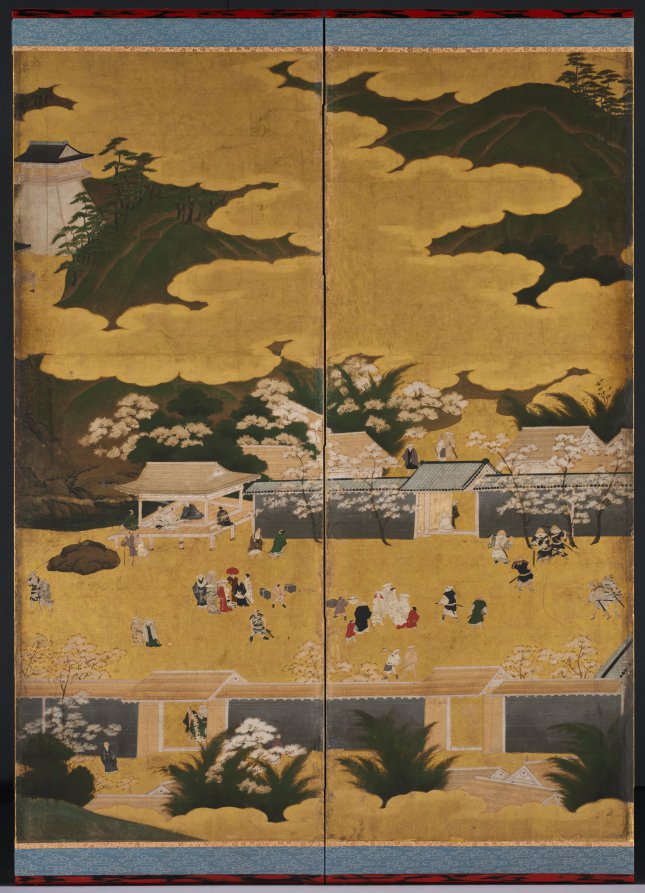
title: Famous Views of Ōmi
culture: Japan, Edo period (1615–1868)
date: 1660s–90s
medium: One of a pair of six-panel folding screens; ink, color, and gold on gilded paper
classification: Painting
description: Ōmi is an area around Lake Biwa near Kyoto. The Shinto shrine Hiyoshi Taisha and the Buddhist temple Ishiyamadera are in the upper right and upper left of the composition, respectively. At center is the pilgrimage route and people in the town before the temple gates. Harvested rice fields to the right and flowering cherry blossom trees at left show seasonal change from winter to spring.